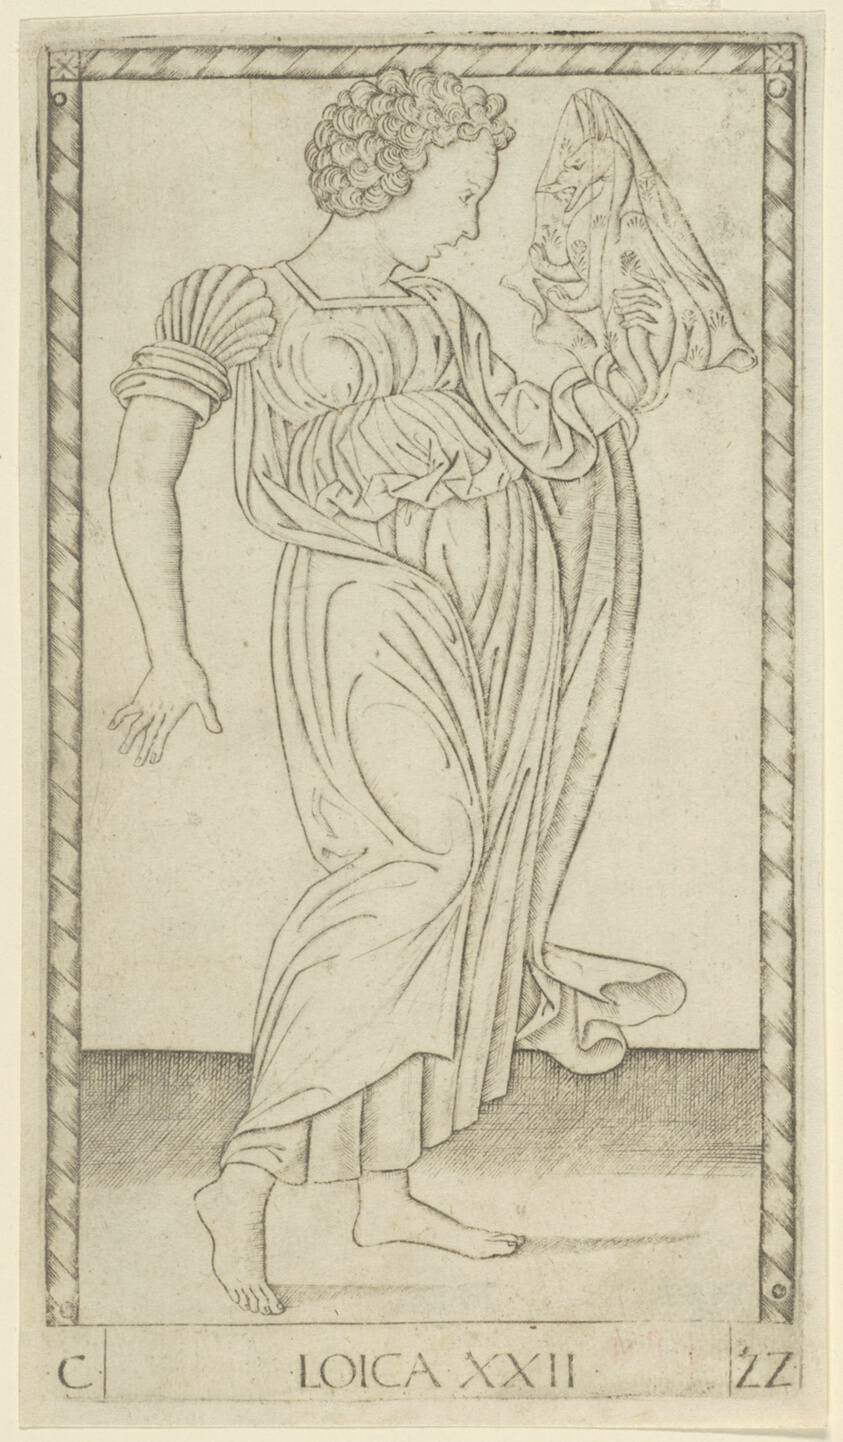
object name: Print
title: Logic, plate 22 from Arts and Sciences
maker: Master of the E-Series Tarocchi (Italian, active c. 1465)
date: c. 1465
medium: Engraving in black on ivory laid paper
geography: Italy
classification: engraving; print; prints and drawing